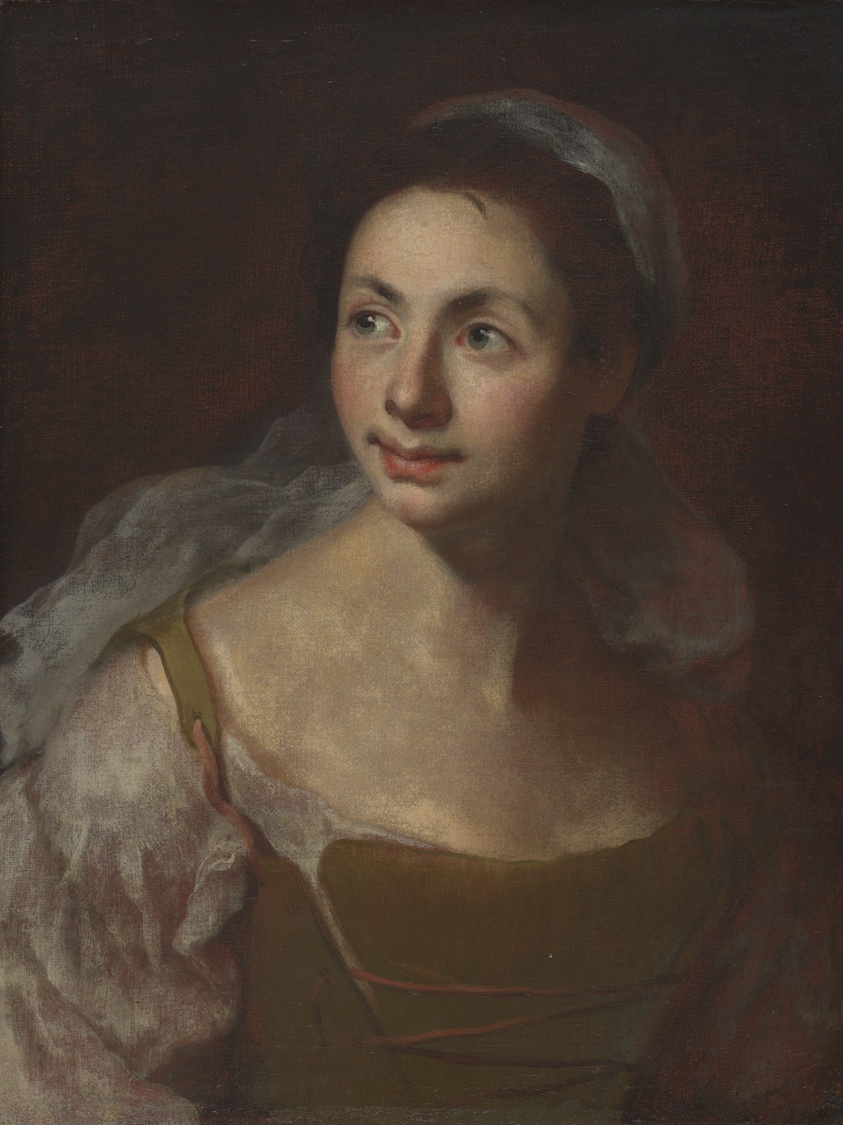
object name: Painting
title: Portrait of a Girl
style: 18th Century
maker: Attributed to Francesco Solimena (Italian, 1657–1747)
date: c. 1700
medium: Oil on canvas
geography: Italy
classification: painting; paint; oil paintings (visual works); oil on canvas; Italian; european painting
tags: portraits: female subject, woman, portrait, girl, youth, portraits, headdresses, dresses